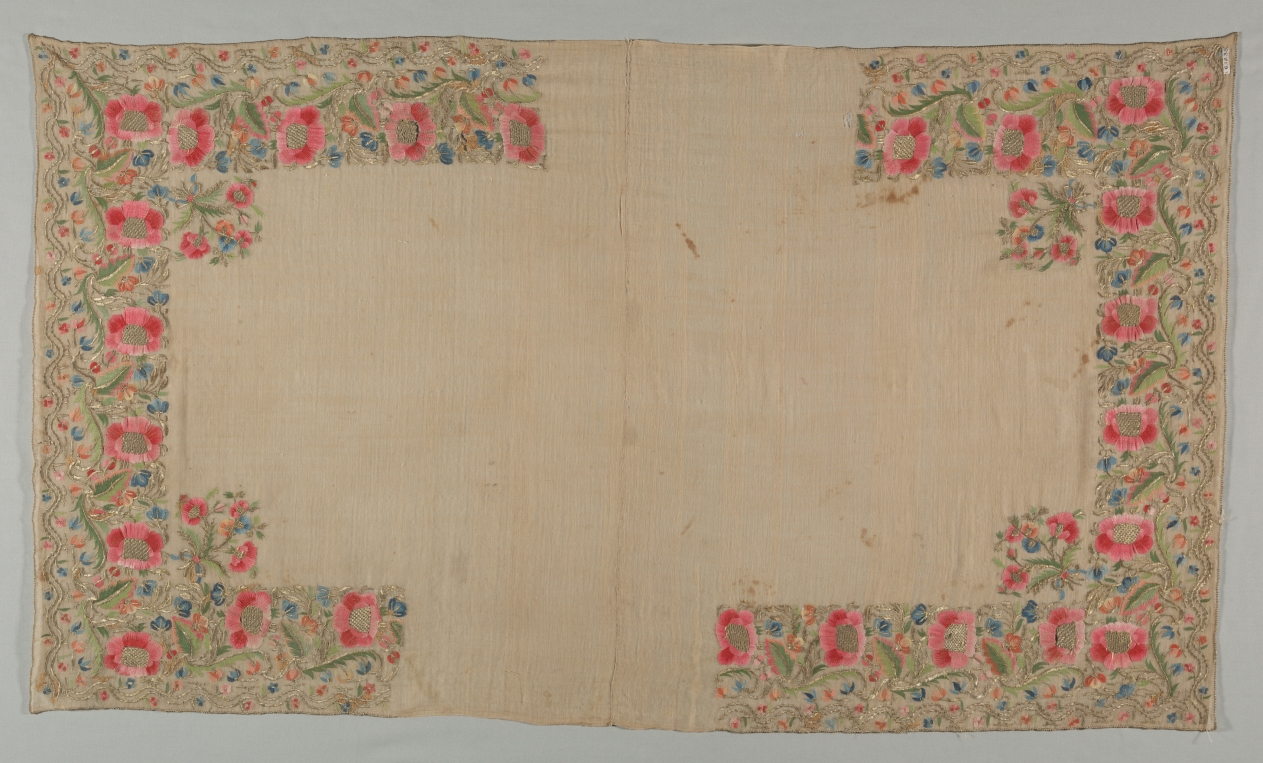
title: Embroidered Towel (Havlu)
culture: Turkey, 19th century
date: 19th century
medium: embroidery: silk and metallic threads on cotton tabby ground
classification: Embroidery